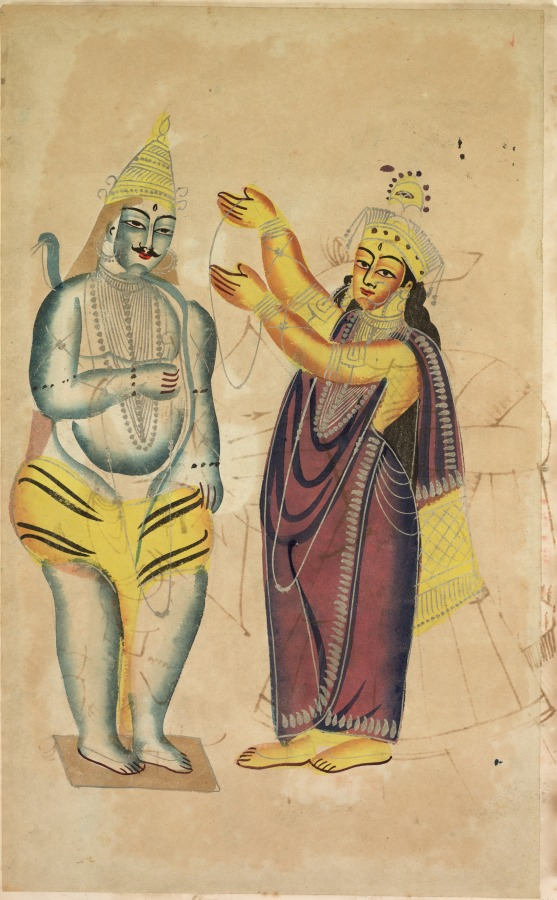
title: Parvati Placing a Wedding Garland on Shiva (recto), from a Kalighat album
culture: Eastern India, Bengal, Kolkata, Kalighat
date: c. 1890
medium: Gum tempera, graphite, ink, and tin on paper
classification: Painting